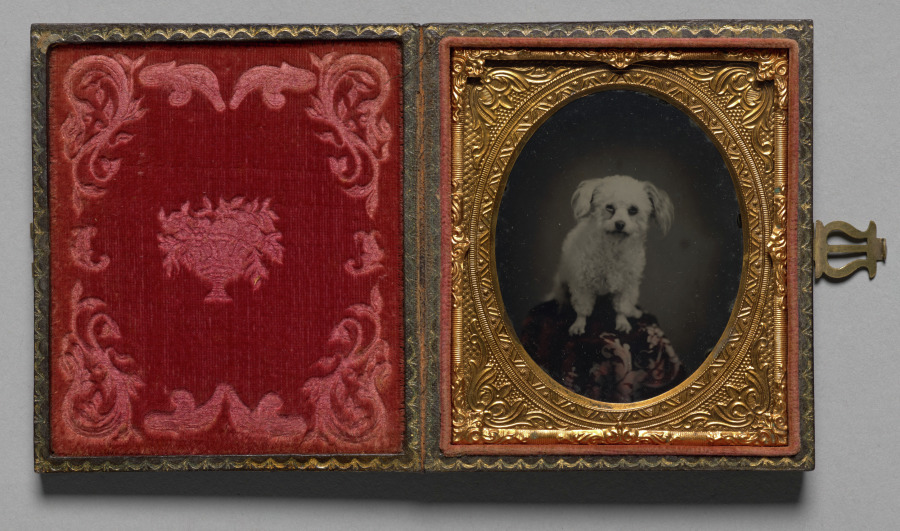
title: Poodle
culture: America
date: c. 1861–63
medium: ambrotype, tinted, sixth plate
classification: Photograph